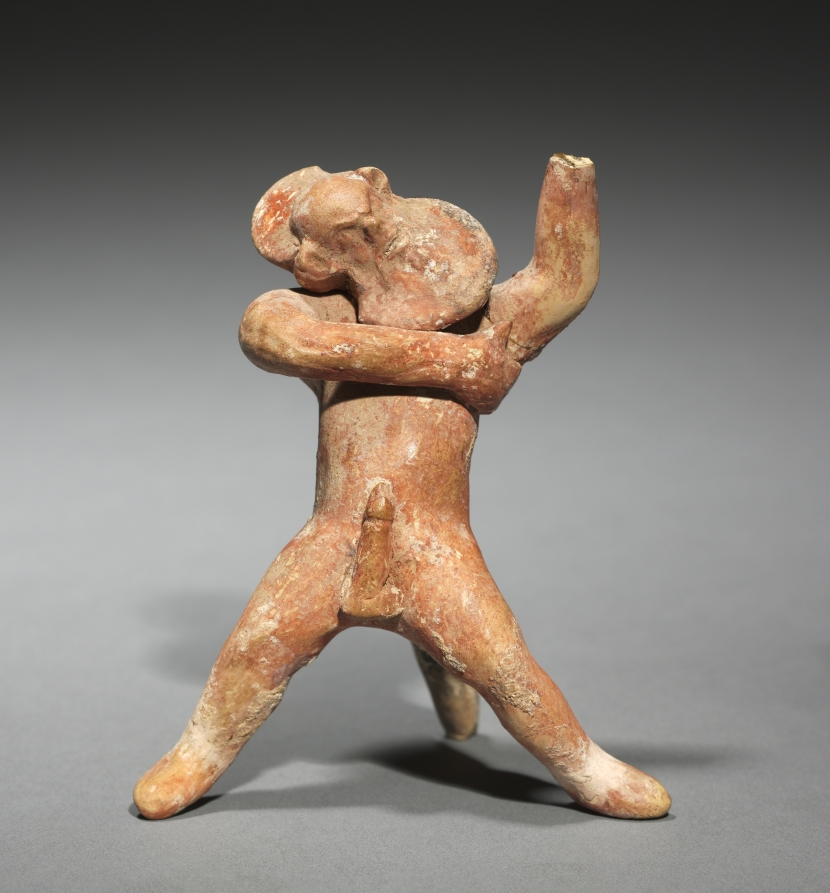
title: Dancing Satyr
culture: Greece, Boeotia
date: 500–475 BCE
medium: painted terracotta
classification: Sculpture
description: Part man and part beast, satyrs were mythical woodland creatures. In art, they were depicted with the ears and tail of a goat or horse, sometimes with hooves, and in a high state of sexual arousal. Satyrs often accompanied Dionysus, the god of wine, in his drinking bouts and other escapades. These three probably once decorated the rim of a large punch-bowl–shaped vessel for serving wine.